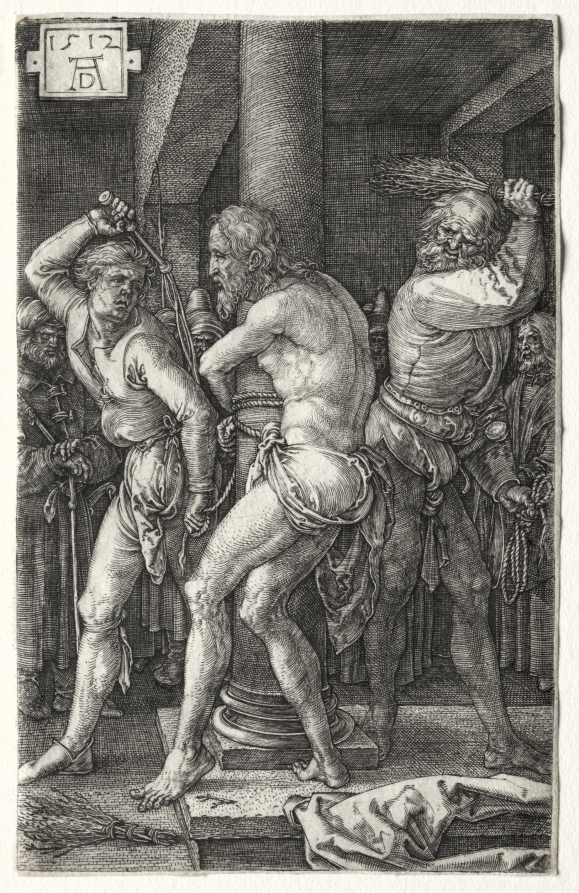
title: The Flagellation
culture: Germany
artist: Albrecht Dürer (German, 1471–1528)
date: 1512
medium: engraving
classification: Print